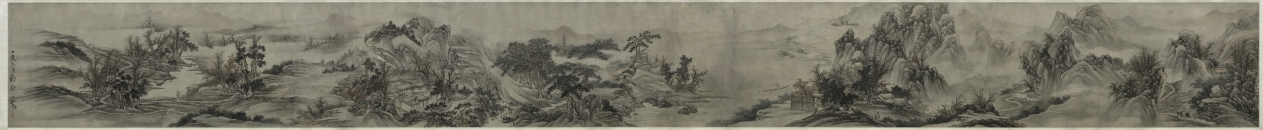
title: Autumn Mist in the Countryside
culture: China, Qing dynasty (1644-1911)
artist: Zou Zhe (Chinese, c. 1610-before 1688)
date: 1647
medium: handscroll, ink and color on paper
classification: Painting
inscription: Artist's inscription, signature, and seal: The first day of the sixth lunar month, the ting-hai year [1647], Tsou Che painted [this]. [seal] Fang-lu.